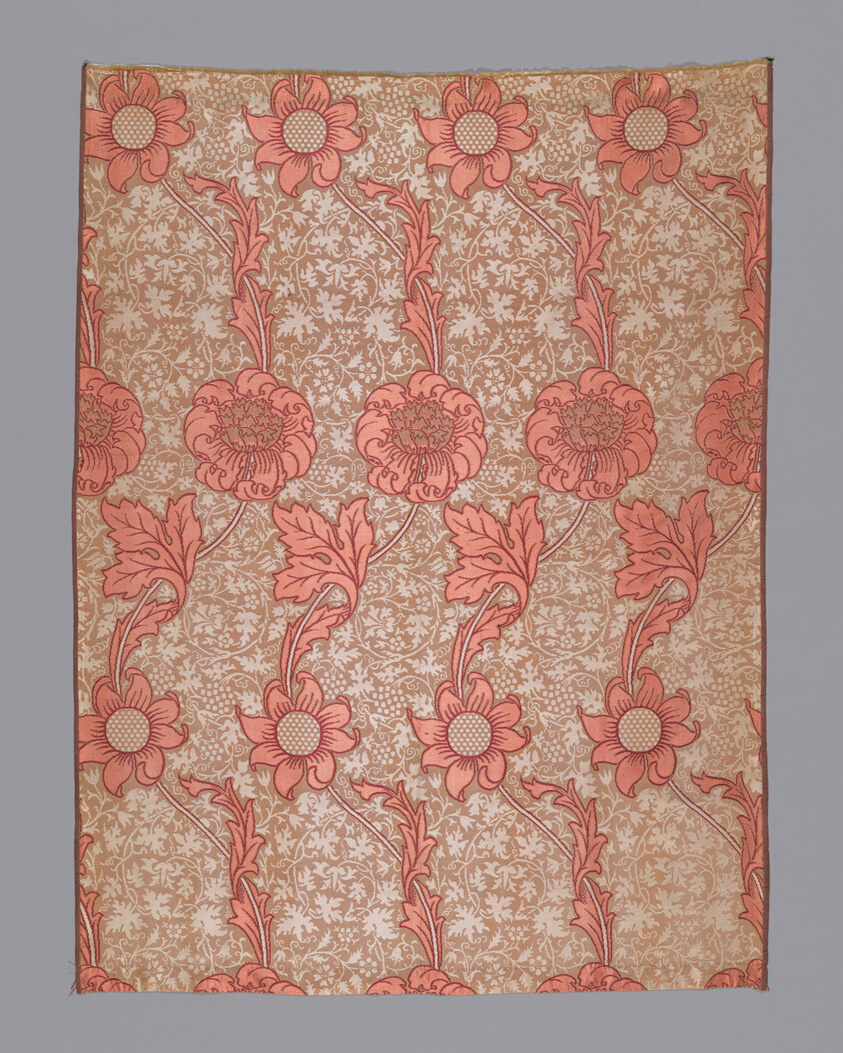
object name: Textile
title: Kennet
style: Arts and Crafts Movement, british, 19th century, British Arts and Crafts Movement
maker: Designed by William Morris (English, 1834–1896); Produced by Morris & Co., London (English, 1875–1940); Merton Abbey, London (English, 1881–1940)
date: Design 1883, made 1887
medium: Silk, satin weave with self-patterning ground wefts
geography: England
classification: textile; weaving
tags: floral, Chicago